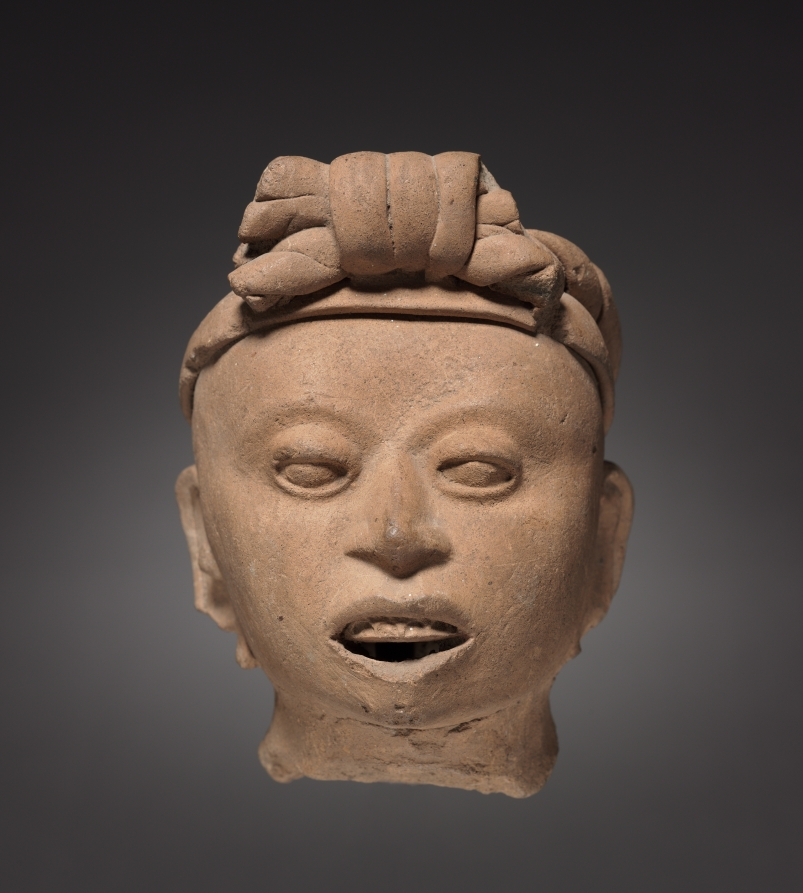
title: Head Fragment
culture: Mexico, Veracruz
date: 900–1200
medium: molded and modeled pottery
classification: Sculpture